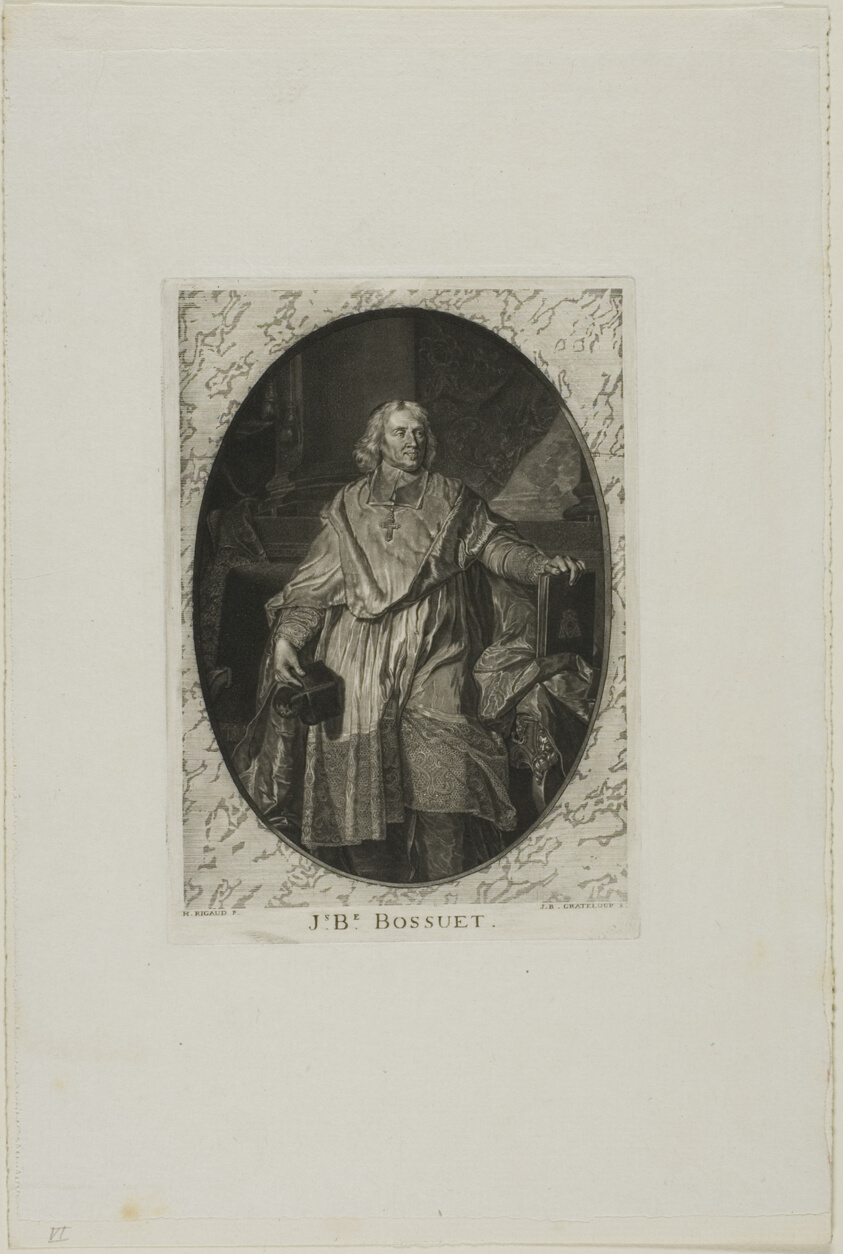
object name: Print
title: J-B. Bossuet: Standing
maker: Jean-Baptiste de Grateloup (French, 1735-1817)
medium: Aquatint on paper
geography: France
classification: aquatint; print; prints and drawing